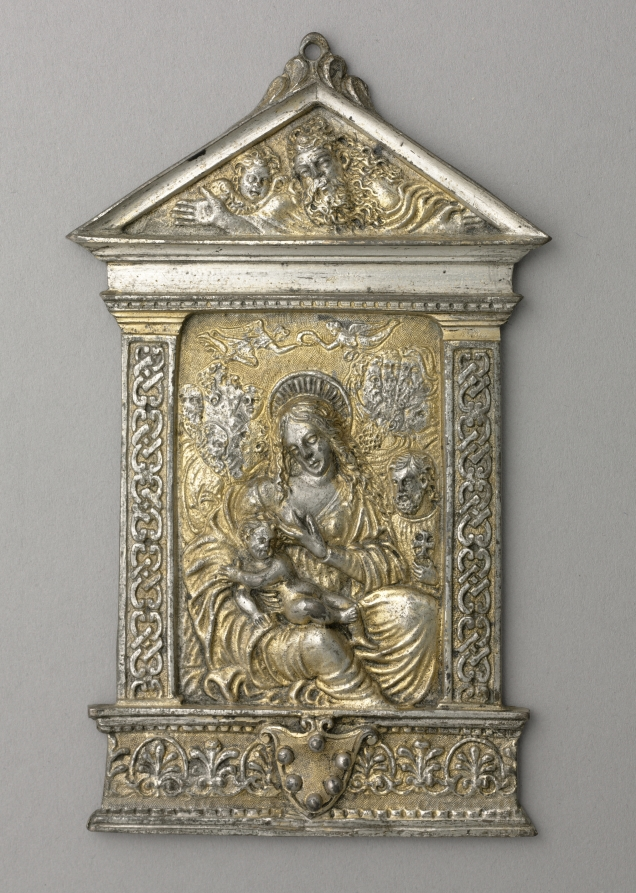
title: Pax with the Madonna and Child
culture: Italy, 16th century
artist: Moderno (Italian, 1467–1528)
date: after 1506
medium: silver and gilt silver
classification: Sculpture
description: A pax is a small flat tablet decorated with Christian images and meant to be kissed by the priest before Communion. The Madonna, crowned with a halo, sits with the Christ child on her right knee, and her drapery falls delicately off her right shoulder as she exposes her breast to the Christ child. Christ's posture is characteristic of an infant, and his body turns out as he clasps onto his mother's drapery while his head faces inward. In the background, Saint Joseph holds a cross. Two angels, each with a wreath, float in the distance above the Madonna's head while on each side of the Madonna, the heads of five male saints are represented, carved in low relief. Some saints focus on the holy family, while others look upward to heaven. Saint Joseph is cast in higher relief, while the Madonna and Child stand in the highest relief. The pax is in the shape of an architectural structure. Above the pediment, the pax's hanging hole is supported by two concave tear shapes on either side of it. The bottom border is decorated with palmettes, and in the center, a shield bears the Medici coat of arms. Within the structure's pediment, God the Father outstretches his arms. A cherub floats to God's right and the two gaze down upon the holy family and saints.